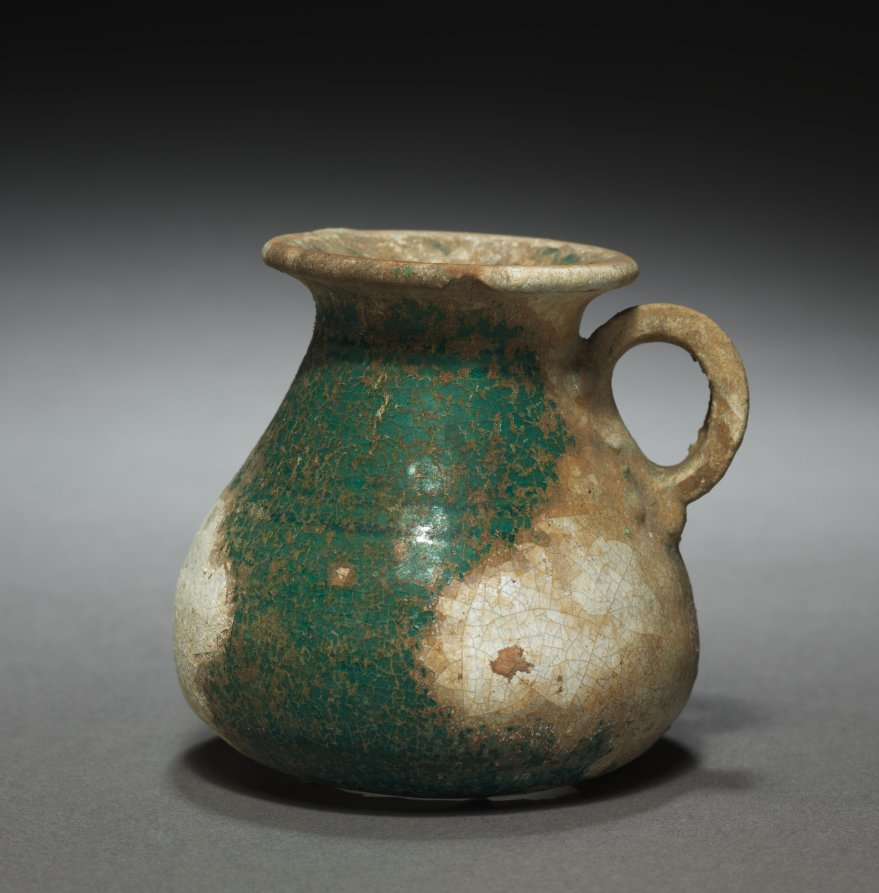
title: Small Pitcher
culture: Parthian Empire (247 BCE–224 CE)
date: 1–200 CE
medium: terracotta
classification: Ceramic